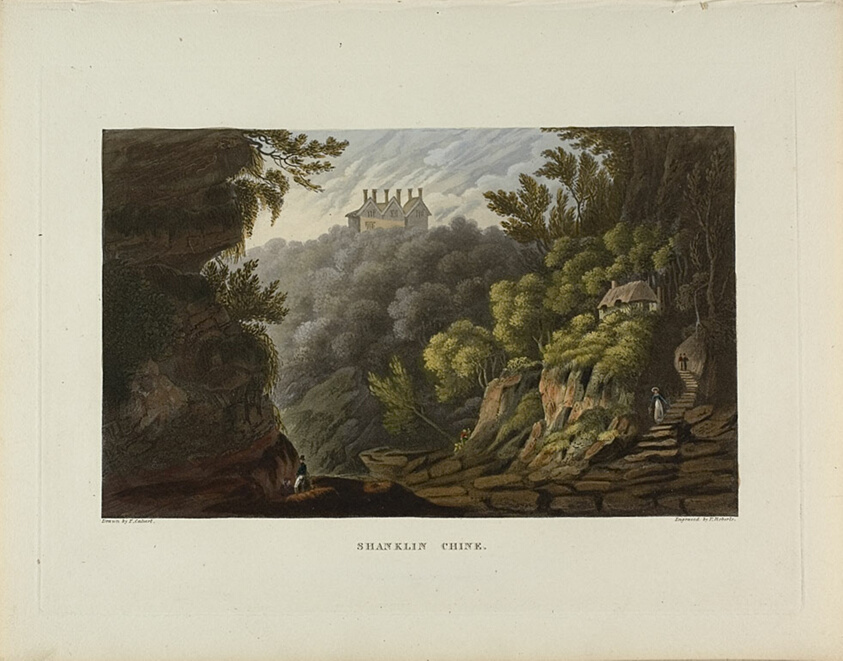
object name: Print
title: Shaklin Chine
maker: P. Roberts (English, 19th century); after Raisey Calvert (English, died 1794)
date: c. 1794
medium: Color aquatint on paper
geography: England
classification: aquatint; print; prints and drawing